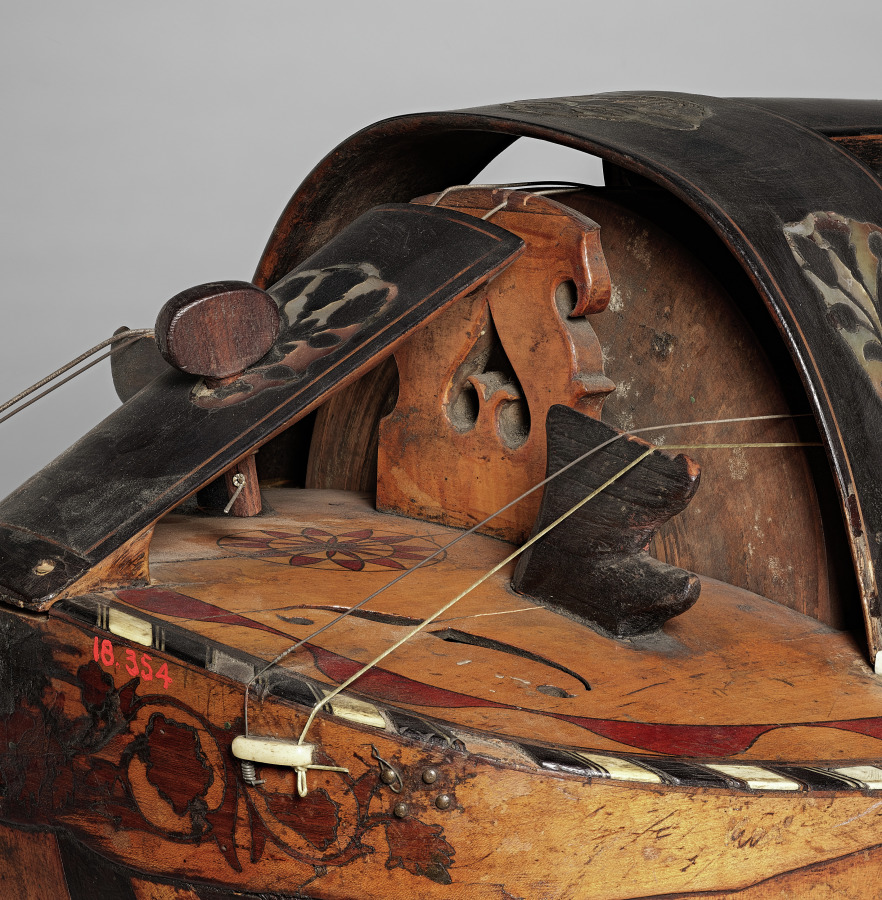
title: Vielle à roue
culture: France, 18th century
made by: Pajot of Jánzat (French)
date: 1700s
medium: wood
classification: Musical Instrument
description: The instrumentalist could play melodies on the keyboard that presses tangents against one or more strings. Often there are also multiple drone strings, which give a constant pitch accompaniment to the melody, resulting in a sound similar to that of bagpipes. This type of instrument is depicted in several artworks in the CMA collection: 1924.656, 2008.34.2, 1960.20. The vielle à roue is also related to the Swedish nyckelharpa, which was featured on the CMA performing arts series in 2017 played by Emilia Amper.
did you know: Also known as a “hurdy-gurdy” or “wheel fiddle,” this instrument produces sound by a hand crank-turned rosined wheel rubbing against the strings.